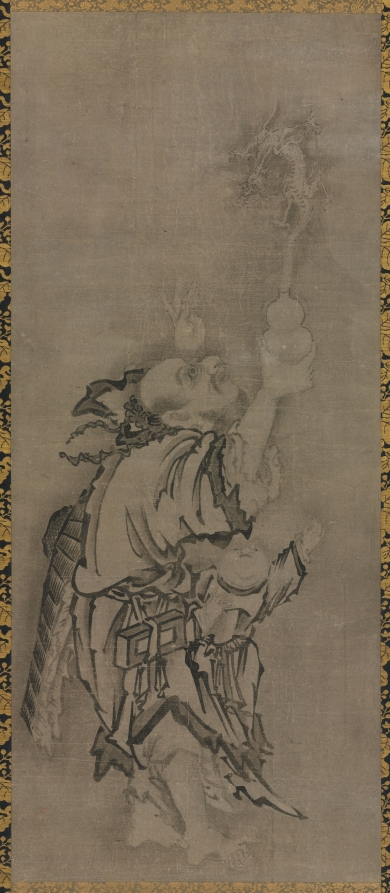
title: Hotei with Daoist Immortals: Immortal with Gourd and Dragon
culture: Japan, Edo period (1615–1868)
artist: Kyūseki Tomonobu (Japanese, 1653–1721)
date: late 1600s-early 1700s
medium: triptych of hanging scrolls: ink on paper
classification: Painting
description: Hotei was a Chan (Japanese: Zen) monk living in China during the 900s who, in the 1300s, became a legendary figure in Japan. At that time a popular cult praising him sprang up, extending beyond Zen to other religious communities. This rare triptych embraces a central Zen icon with flanking Daoist images, thereby suggesting the compatibility-rather than the exclusivity-of these two creeds. Hotei also enjoys popularity in Japan as a kind of genre, or folk figure, which explains his mirthful expression in Japanese paintings. The Daoist figures in contrast appear eccentric and foreign-looking, in keeping with Daoist lore. When these paintings came to the museum their appearance was compromised by poor quality textile mountings, and cracked paper surfaces deserving of restoration. The fact that these scrolls constituted an integral set that properly had to be shown as a unit heightened the need to stabilize their condition and improve their presentation for museum visitors. A complete remounting of each scroll occurred following the cleaning of the paper surfaces and the repair of the lifting surface areas. No inpainting was done, thereby preserving the original ink values and brushstrokes.